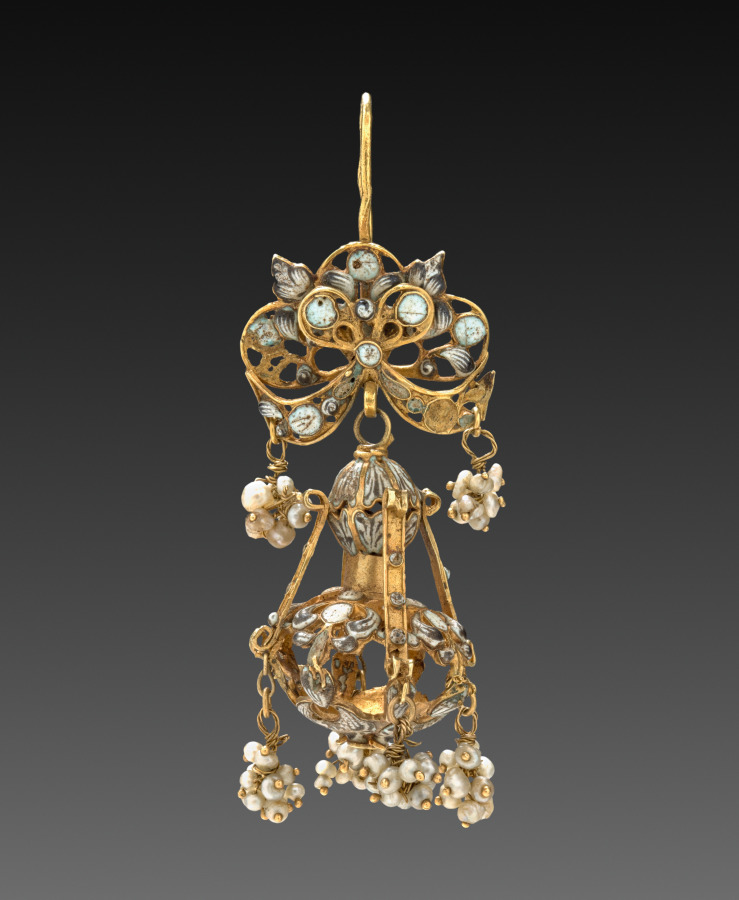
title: Earring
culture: Italy, Sicily, 18th-19th century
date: 1700s - 1800s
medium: gold and enamel with pearls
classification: Jewelry